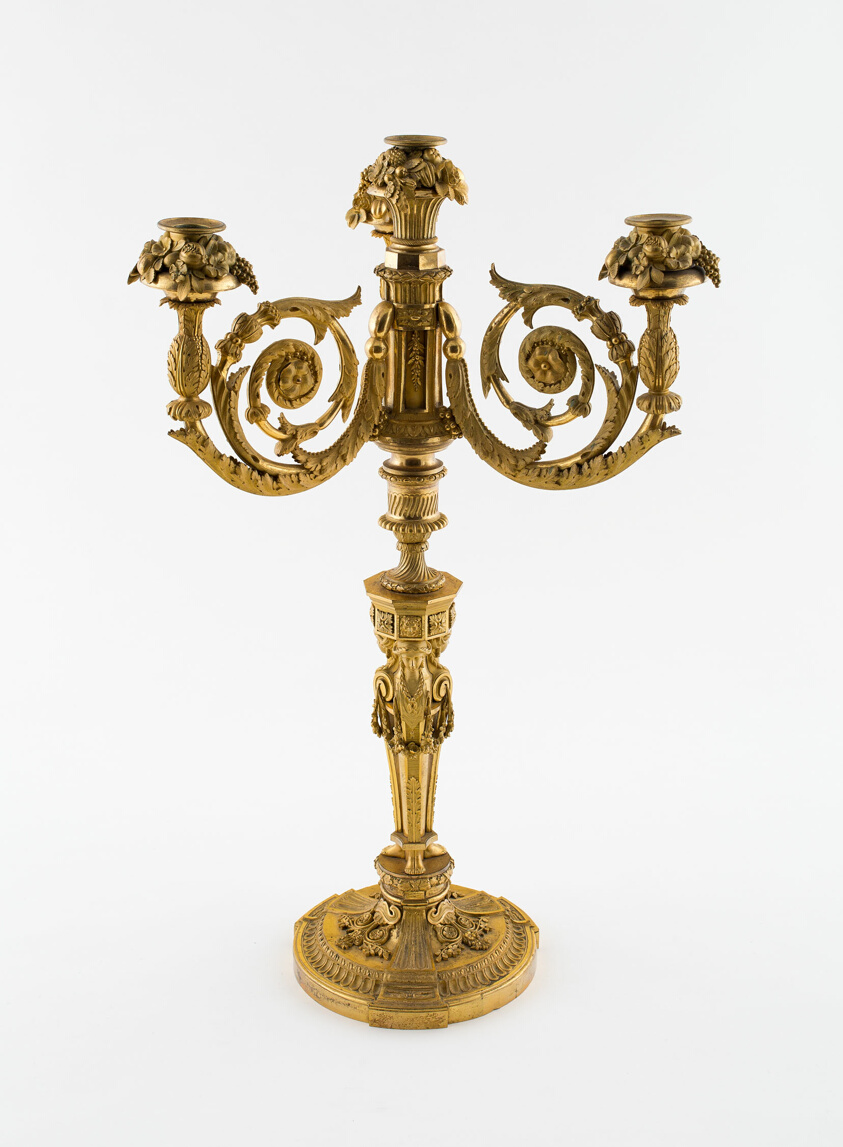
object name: Metalwork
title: Pair of Candelabra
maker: In the manner of Pierre Gouthière (French, 1732-1813/14)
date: c. 1789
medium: Bronze gilt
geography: France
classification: candleholder - candelabra; lighting device; furniture; european decorative arts; metalwork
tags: furniture